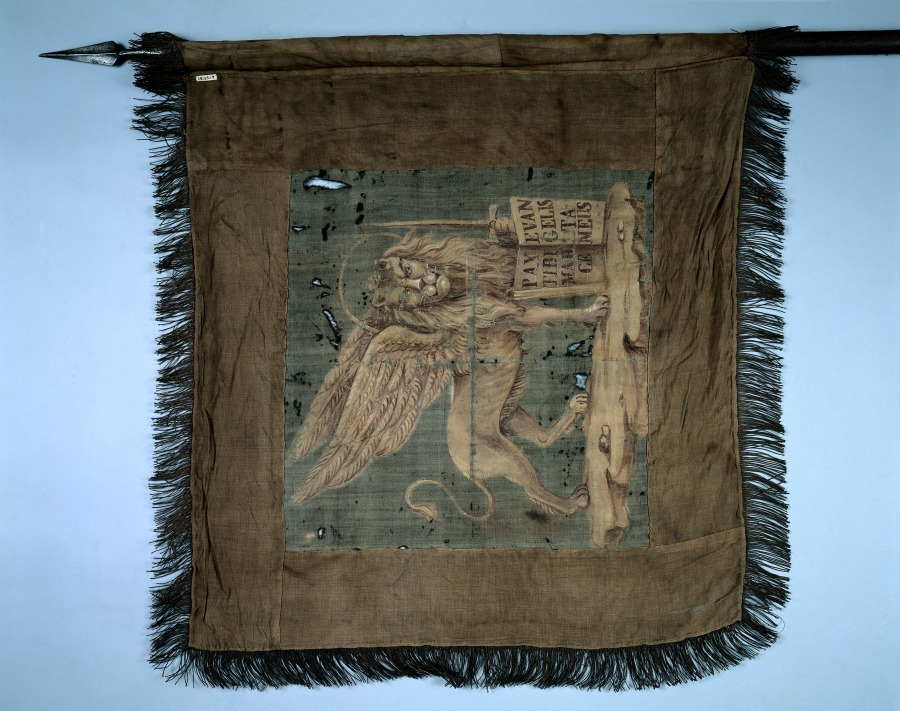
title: Banner With the Lion of St. Mark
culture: Italy, Venice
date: late 1600s - early 1700s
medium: brown silk with fringe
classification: Textile